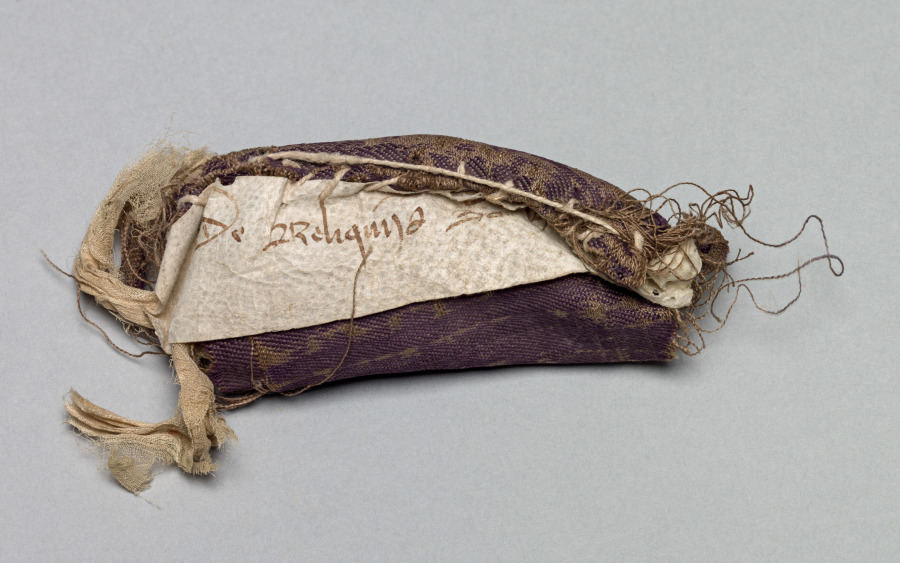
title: Relic of St. Hermetis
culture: Germany, Lower Saxony?, Romanesque period, 11th century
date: c. 1045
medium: bone, compound weave or samite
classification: Metalwork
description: This relic is in the portable altar commissioned by Countess Gertrude of Brunswick, one of the Guelph Treasure’s earliest and most sumptuous objects.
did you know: This relic is a long bone from an arm or a leg (such as a humerus, femur, or fibula); exact identification is not possible without unwrapping.